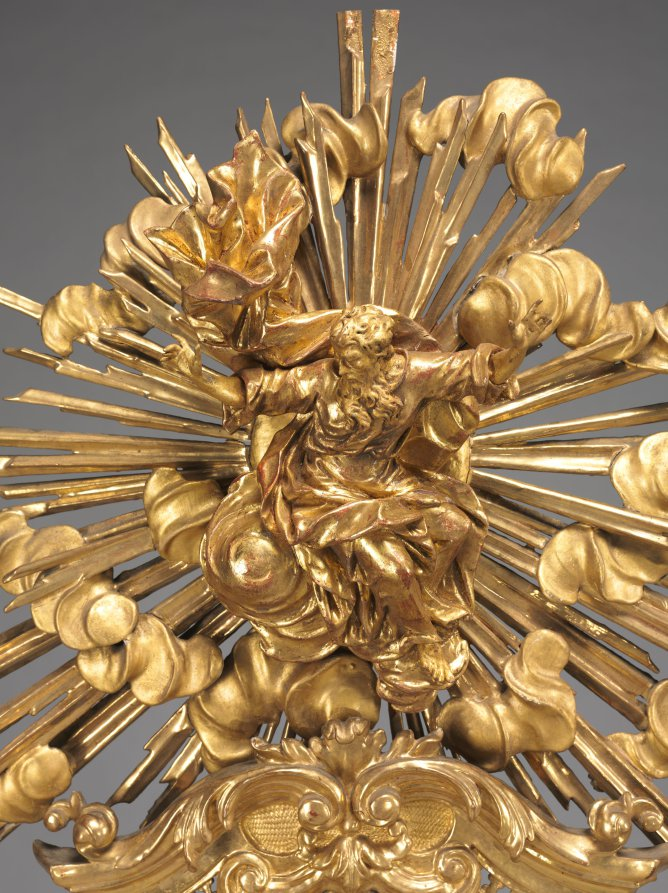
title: Altarpiece with Relics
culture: Germany, Bavaria, 18th century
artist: Joseph Matthias Götz (German, 1696–1760)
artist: and Workshop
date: c. 1735–40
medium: gilded wood, with relics in niches: gilded wood, mother-of-pearl, ebony, red silk, gold wire, seed pearls, rock crystal, pen and ink on paper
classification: Sculpture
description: Götz covers every surface in gold leaf, giving each part of the object equal importance, rather than simply framing a central picture. In this distinctively Central European approach, figural narrative is subordinate to the overall ensemble. Götz designed this object to rest on top of an altar, probably in front of a larger painted or sculpted decorative scheme. The work contains relics seen through the small windows on the perimeter. These small remains of holy figures demonstrate the persistence of a medieval Catholic tradition well into the 1700s.